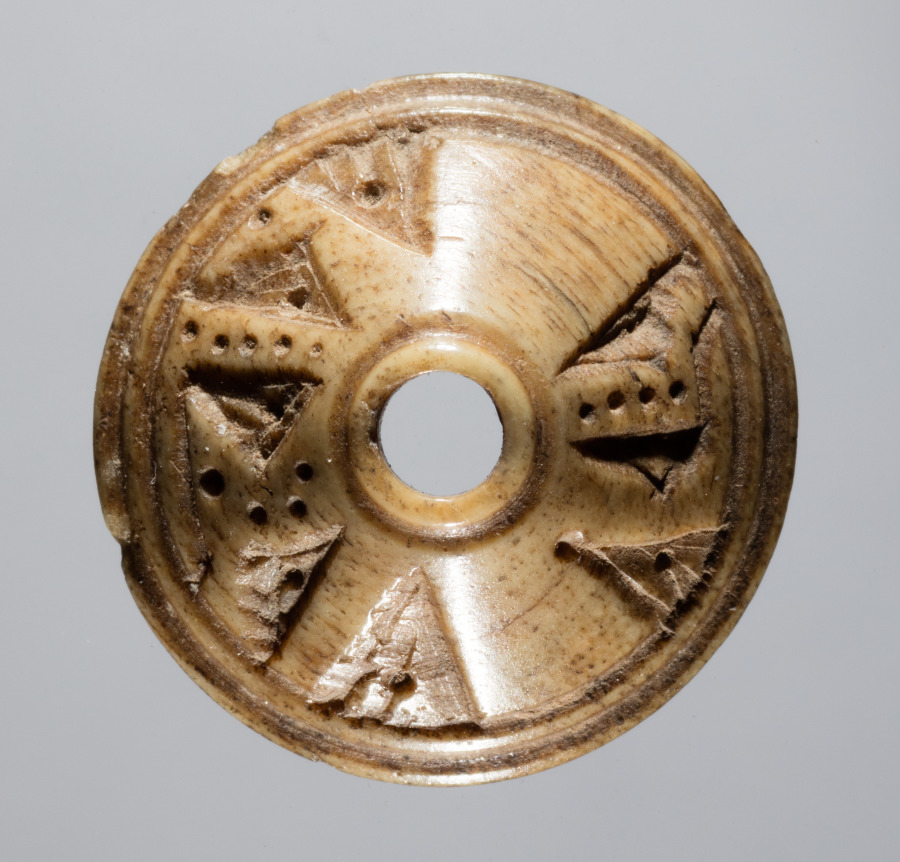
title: Spindle Whorl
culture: Iran, early Islamic period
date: 700s - 900s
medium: bone, incised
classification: Spindle Whorl